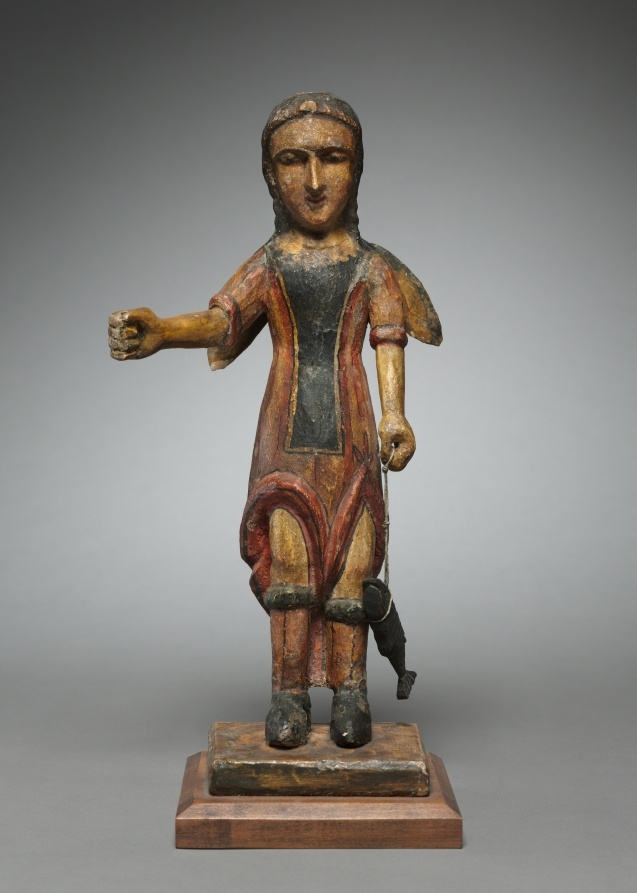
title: San Rafael - Archangel: santo de bulto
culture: America, New Mexico, 17th-18th century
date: 1600s-1700s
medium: painted wood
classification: Sculpture